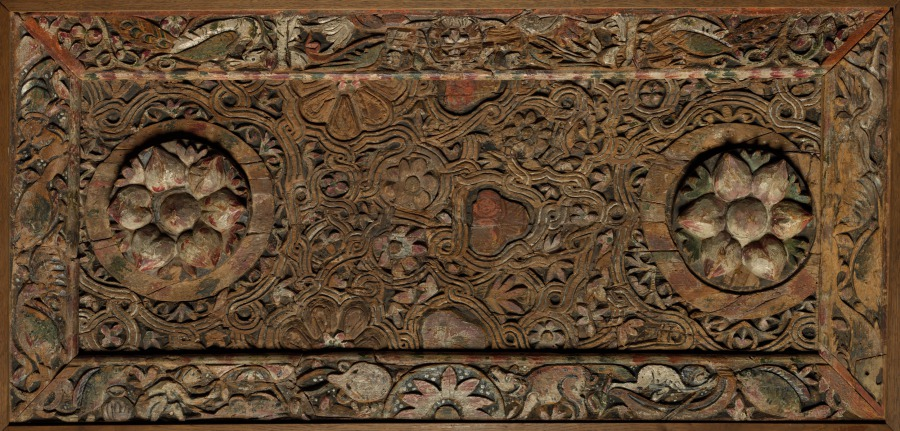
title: Ornamental Panel (from a Ceiling?)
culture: Egypt, Coptic period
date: 500s (frame) and 700s (central panel)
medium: wood with paint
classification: Furniture and woodwork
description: This wooden panel and its frame come from different locations. The four narrow panels forming the outer frame are stylistically datable to the 500s. The large central rectangular panel might date to the 700s. It is most likely a carved ceiling, but its architectural context is unknown. Both panel and frame have been cut down and joined together at some point in their history under unknown circumstances. The decorative program of the main panel features two large rosettes surrounded by florets, leaves, and fruit. The outer frame features two flying angels holding a wreath, a peacock, an octopus, a seated fisherman who holds a long line with a fish attached, and a swimming boy with a dolphin. The vocabulary of the frame is dominated by water life, particularly of the Nile and its banks. Though separated from its original place and altered, this important object provides a welcome glimpse of an architectural interior from early Christian Egypt.